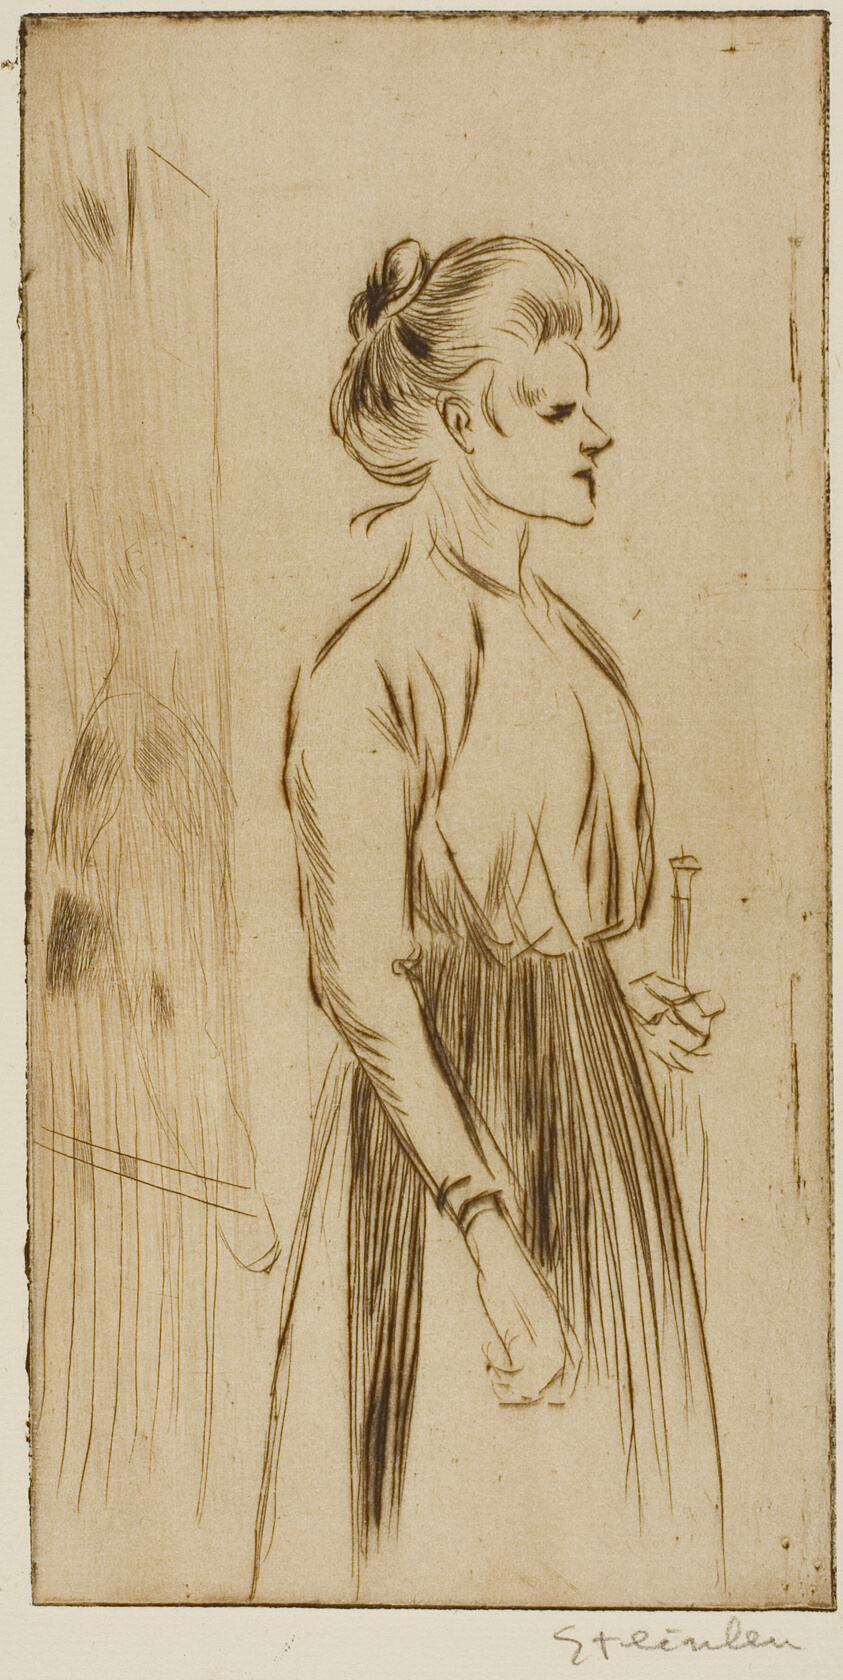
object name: Print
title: Hard Woman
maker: Théophile-Alexandre Steinlen; French, born Switzerland, 1859-1923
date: 1898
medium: Drypoint from a zinc plate on ivory laid paper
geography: France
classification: drypoint; print; prints and drawing